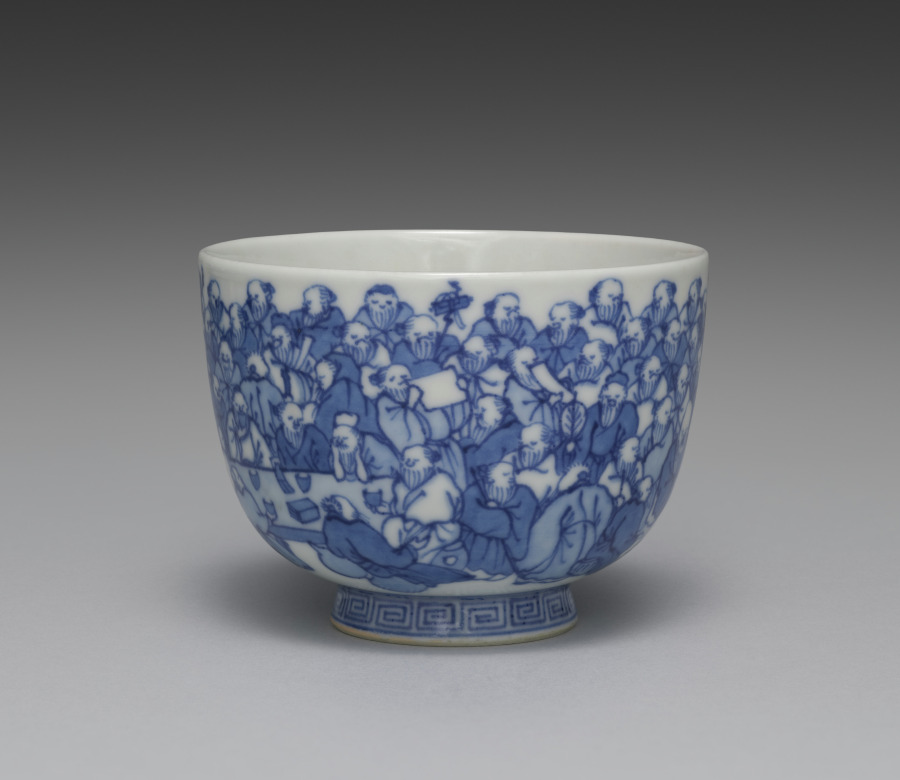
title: Teacup from Teacups with a Hundred Sages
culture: Japan, Meiji period (1868–1912)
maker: Seifū Yohei III (Japanese, 1851–1914)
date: 1893–1914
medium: One from a set of five teacups; porcelain with underglaze blue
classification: Ceramic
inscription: 清風造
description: Each of these five teacups has a painting of identical design in underglaze blue, but as the tiny figures are drawn entirely by hand, each cup has its own personality. The theme of the sencha cups is an assembly of sages or immortals, literally “a hundred venerable [people]” (hyakurō). The myriad figures crowd the scene in groups. The god of longevity, with his tall forehead, sits with his cranes, having flown in from Mt. Penglai on the Isle of the Immortals. Seven long-bearded sages sit around a stone table, chatting and drinking; one is seated on an enormous gourd. Of course, there is a stack of books on the table, and elsewhere, scrolls are being written upon or read—in one case held very close by a sage who is wearing glasses. The design was enormously popular in ceramics made for those engaged in literati culture.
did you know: Seifū Yohei III (1851–1914) produced many works for tea gatherings where people drank Chinese-style leaf-tea (sencha).